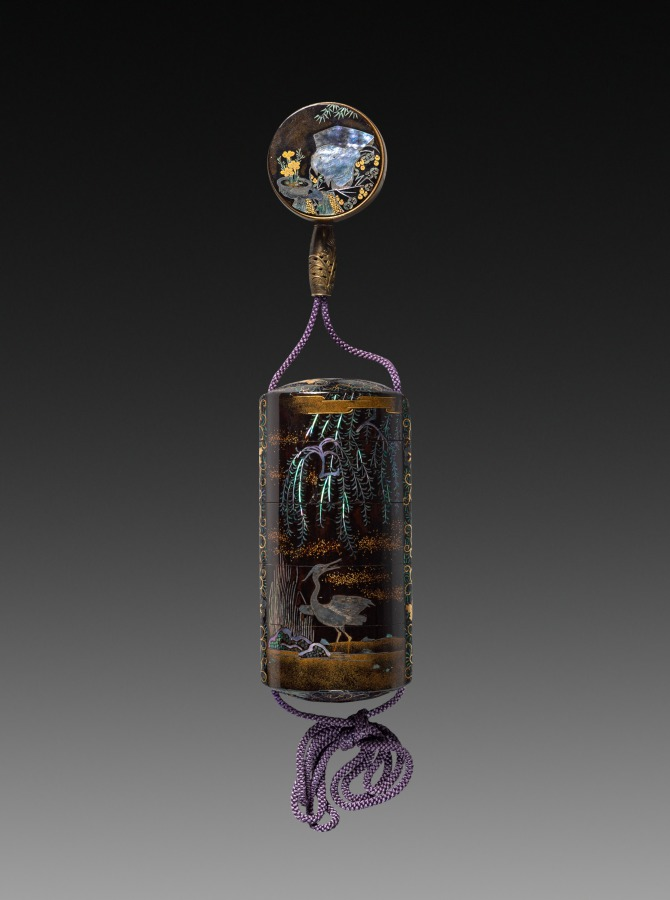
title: Inro (Case) with Egrets and Willows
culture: Japan, Edo period (1615–1868)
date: 1700s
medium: Lacquer on wood with sprinkled gold powder design (maki-e) and gold-foil-and-shell inlay (Somada style)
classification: Lacquer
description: The iridescence of this inro is due to the shell inlay used to form the design of an egret (a waterfowl) standing among reeds in water beneath a weeping willow on one side and an egret resting in a tree on the other. The metal ojime (cinch) has a floral design, and the round lacquer netsuke, or toggle, has an image of a Chinese gentleman, possibly an immortal, holding flowers planted in a shallow pot.